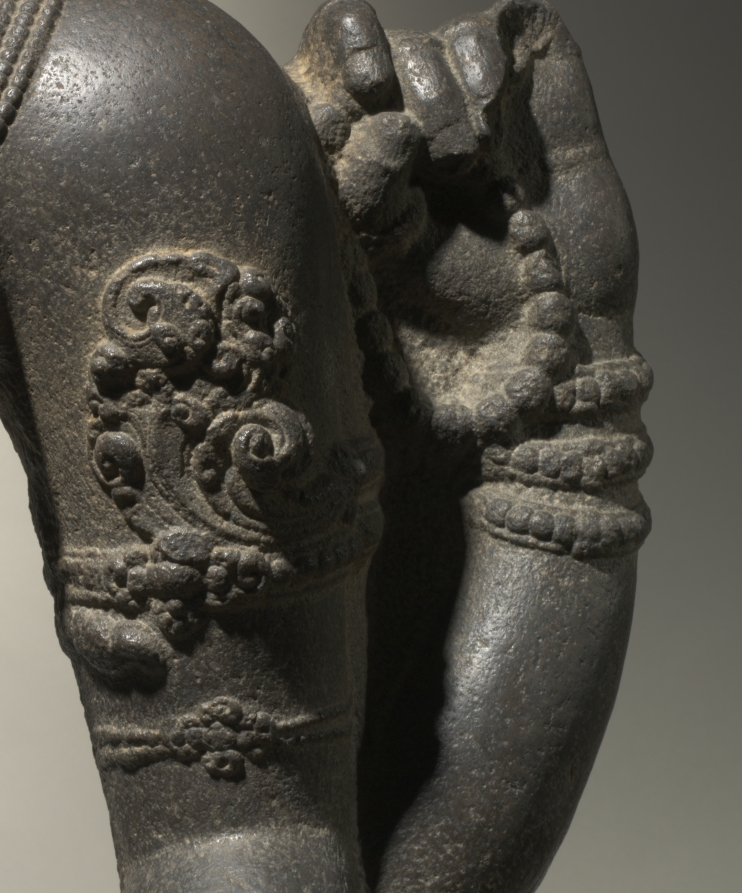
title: Brahma-Shiva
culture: South India, Tamil Nadu, Chola dynasty, late 10th - early 11th century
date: late 900s–1000s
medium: granite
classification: Sculpture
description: In the Hindu pantheon Brahma is in charge of carrying out the work of creation. In this tour-de-force of South Indian temple sculpture, he is in a special regal aspect, with the only elements of his typical priestly appearance being the prayer beads and the matted dreadlocks piled on his head. Four arms connote superhuman power, and four heads convey the idea that his creative activities spread in all four directions. His upper right hand enjoins freedom from fear, and the lower holds a lotus bud associated with birth and the process of creation. His lowered left hand is held in the gift-giving gesture, suggestive of the gift of creation he will bestow upon the world.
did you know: The back of the sculpture retains the original textured surface from a pointed chisel, suggesting it was in a niche or near a wall, protected from worshippers’ touches.